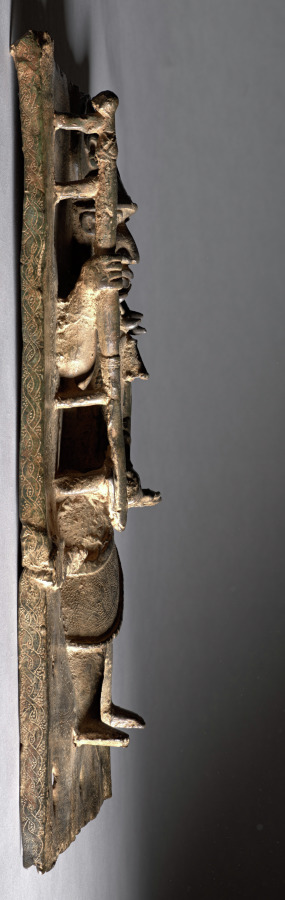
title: Plaque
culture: Nigeria, Benin Kingdom, Ẹdo peoples, members of the Igun Eronmwon (royal brasscasters) guild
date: 1500s–1600s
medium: Copper alloy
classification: Sculpture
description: Craftsmen modeled brass plaques like this in wax before casting them with hot metal. Molds pushed out figures’ general shapes, then details—such as this warrior’s staff and court sword (ẹbẹn)—were added by hand. Reflecting Benin’s global connections, the incised flowers may have Islamic or European origins. Called ebe-amẹn (river leaves) they are identified with Olókun, god of the waters. The interlaced side motifs may connect several early plaques also linked by topic and style. The palace plaques were in storage before the 1897 Siege of Benin. Recently, an art historian virtually reconstructed their former display in the palace based on their dimensions and imagery.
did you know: The bent sides of this plaque once helped attach it to wooden beams in a palace.